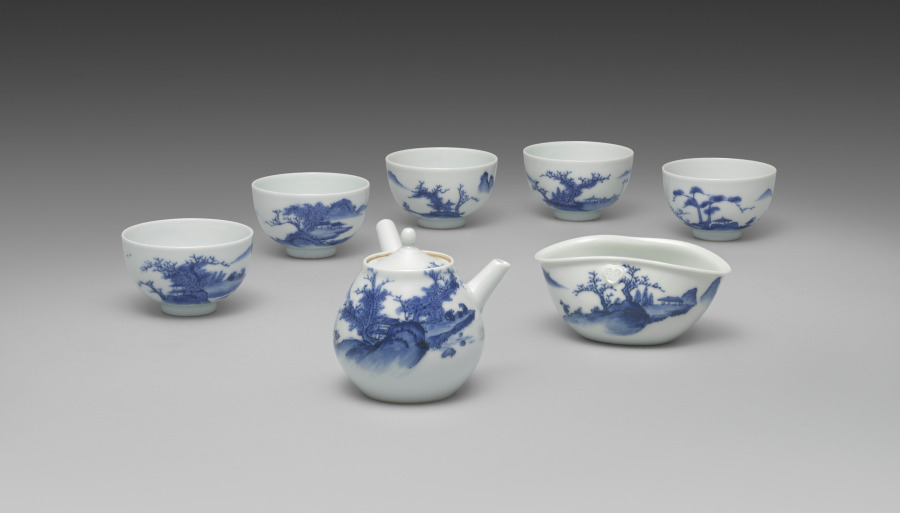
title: Tea Set with Chinese Landscapes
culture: Japan, Meiji period (1868–1912)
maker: Seifū Yohei III (Japanese, 1851–1914)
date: 1893–1914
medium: Tea set with tea pot, hot water cooler, and five cups; porcelain with underglaze blue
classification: Ceramic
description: The theme of this sencha tea set is the Chinese scholar-recluse in an idyllic landscape. The teapot depicts two friends playing a board game on a promontory beyond a two-storied residence, while another figure comes across the entry bridge bearing bags of provisions, hung from the ends of a pole balanced across his shoulders. The kidney-shaped water cooler has a scene of a man gazing at a full moon in a dramatic mountain-scape stretching before a large compound in the woods. Another man, hunched over and carrying a heavy parcel tied to a pole over his shoulder, struggles to make his way up a hill to the site. The cooler also has a pair of applied nyoi staff-head forms for resting the tips of one’s thumb and index finger, like those on the water cooler with pine trees (see [19 ]). Each of the five teacups has a landscape with an architectural structure and some human activity. One cup shows a man with a staff walking away from a residence toward a boat, loaded with what might be a musical instrument wrapped for travel. A second cup shows a man rowing a little skiff, which disturbs the otherwise still water. Behind him in the distance is an open-air pavilion. He is making his way toward a pair of figures playing a board game, much like the scene on the teapot. Down the hill from them is a residence; beyond this, a flock of geese approaches through the sky. A third cup shows a man in a traveling robe leaning upon his staff as he crosses a bridge to reach a two-story building with a pitched roof, possibly a temple, set between trees. Past this structure, another man sits fishing in a boat. A fourth cup shows a humbly dressed man with a broad-brimmed hat lugging a package tied to the end of a rod slung over his shoulder. In front of him is a two-story building flanked by deciduous trees and a man resting against the side of a sturdy stone bridge as he looks at a residence, or perhaps a set of roofed gates, further up the path. The last cup has a man walking toward a group of three pavilions announced with a banner hanging from a tall post; beyond this are two large deciduous trees sheltering a stand of small conifers. Across the water from this site is another man sitting on the bank fishing with a large woven basket for his catch beside him.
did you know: Images of famous sencha events that shows that these kinds of porcelains fit with objects, such as a stove and kettle, to form a complete set of utensils for tea preparation, and with ensembles of decorative objects meant to inspire creativity.